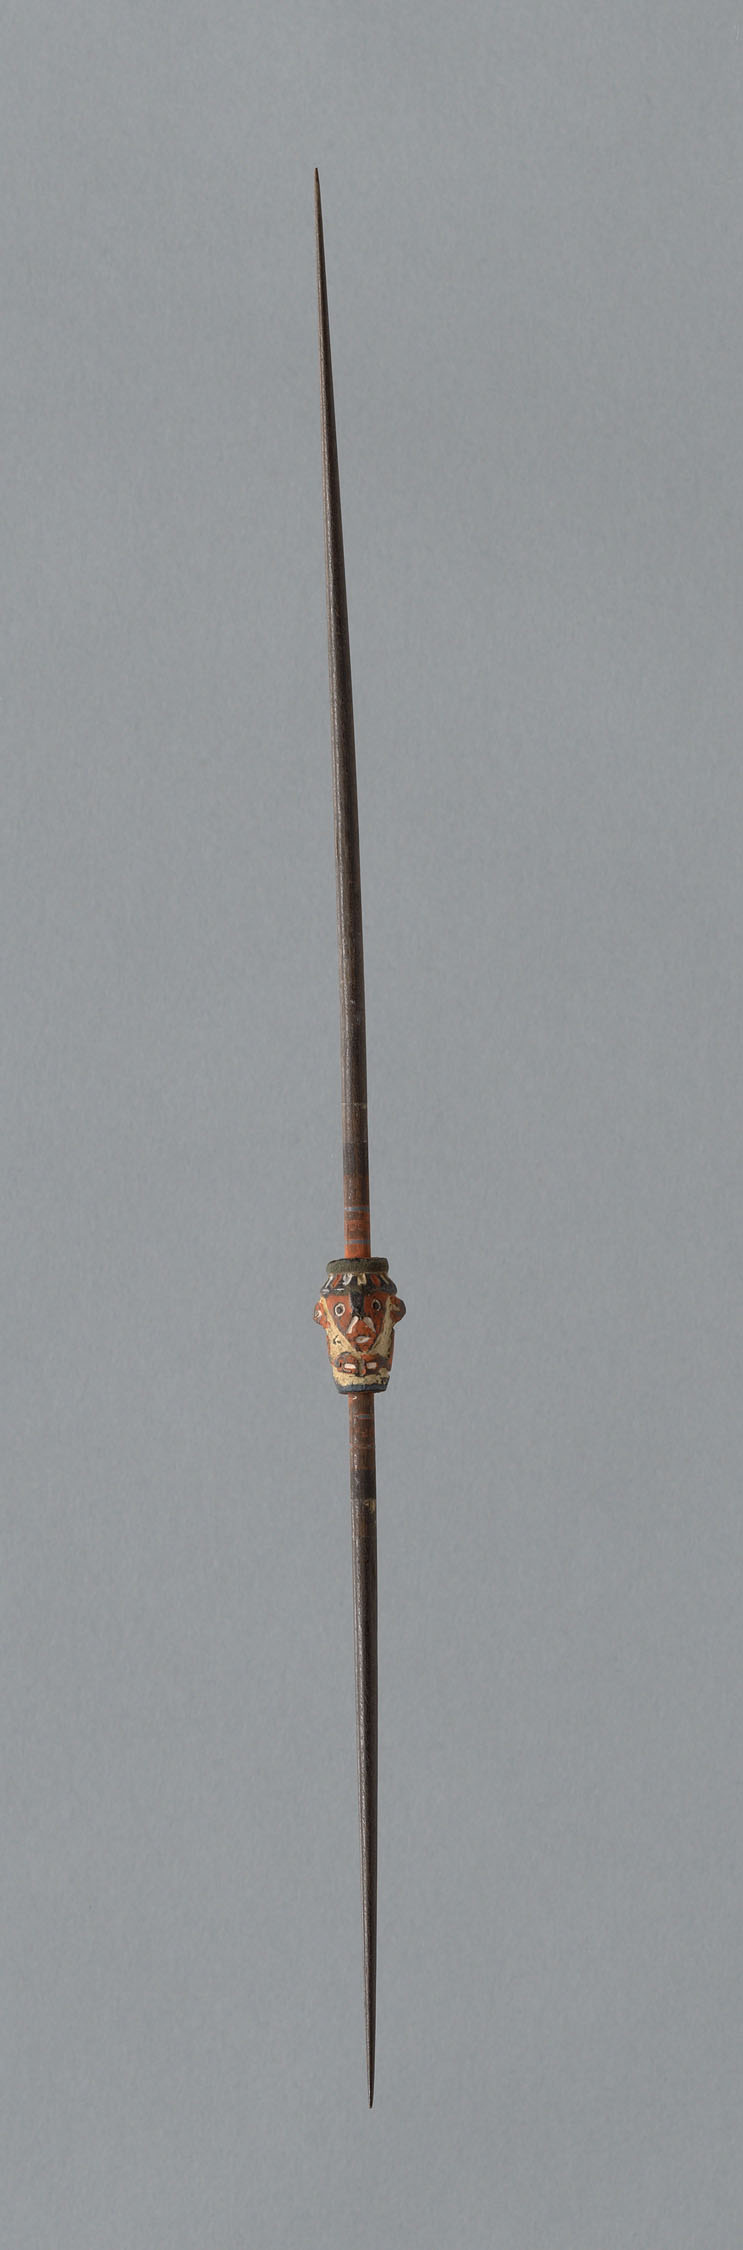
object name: non-art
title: Wooden Spindle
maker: Peru, Possibly central coast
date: 1000/1476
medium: Wood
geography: Peru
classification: spindles (textile working equipment); textile working equipment; accessories (object genre); textile